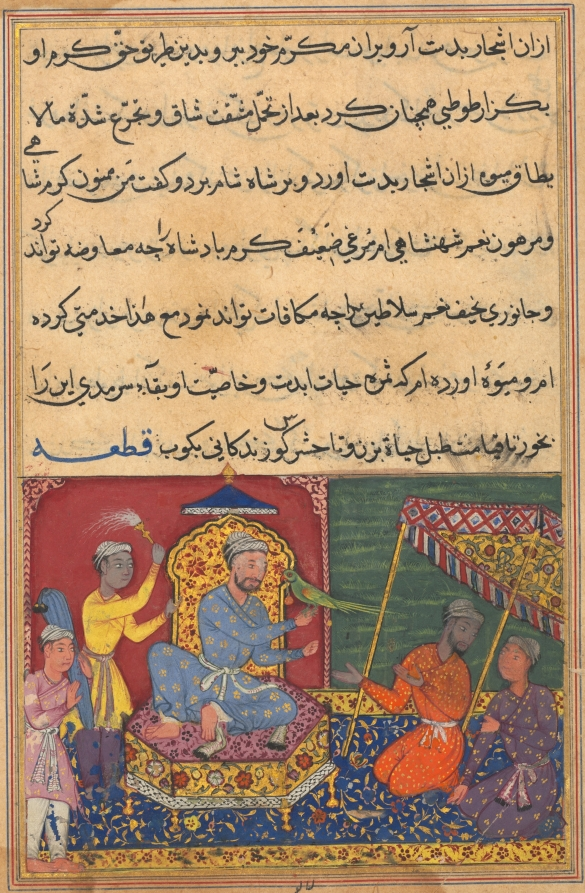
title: The parrot brings a fruit from the Tree of Life to the king of Syria, from a Tuti-nama (Tales of a Parrot): Ninth Night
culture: Mughal India, court of Akbar (reigned 1556–1605)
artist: Lalu (Indian, active mid-1500s)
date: c. 1560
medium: gum tempera, ink, and gold on paper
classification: Painting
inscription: lālū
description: A wise, green parrot perches on the hand of the king of Syria. Clutched in his beak is a small orange fruit that he plucked from a tree in the netherworld and brought back as a reward for many years of the king’s kindness. Despite being offered eternal life, the king is hesitant to eat the fruit.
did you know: Outside of this manuscript, only one other known work is attributed to the painter Lalu.